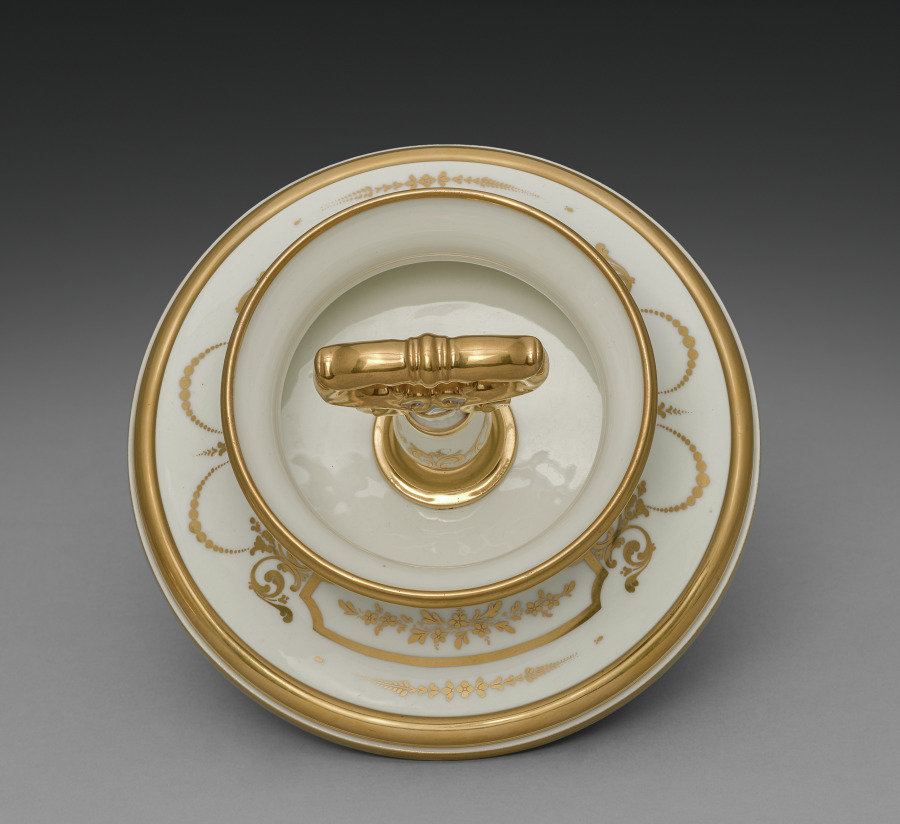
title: Lid for an Ice Cream Pail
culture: France, Paris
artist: Factory of Jacob-Petit (French, 1830–1865)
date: c. 1840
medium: gilt porcelain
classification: Ceramic